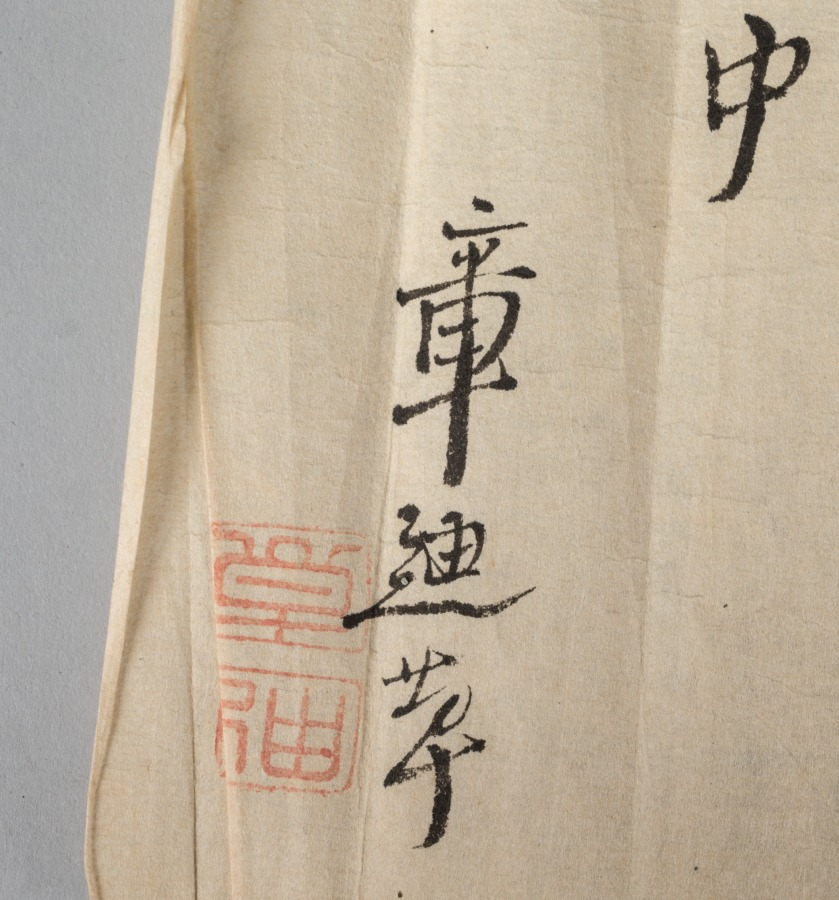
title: Happy Forest, from Water Margin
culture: Japan, Edo period (1615–1868)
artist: Matsumura Goshun (Japanese, 1752–1811)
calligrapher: and Amenomori Shōteki (Japanese, 1731–1786)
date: late 1700s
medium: hanging scroll; ink and color on paper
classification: Painting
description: The Chinese literary classic Water Margin is set in the 1120s and tells the story of 108 outlaws who first rebel against the government and then join forces with it. This painting depicts an episode in which hero Wu Song reclaims the tavern Happy Forest for its rightful owner, the prison warden’s son, Shi En. To prepare for the fight, Wu Song drinks a lot of wine. The painting was inscribed with a quote in which an ally describes Wu Song’s fighting style. It reads as follows: Where his twin fists rise, clouds and thunder roar, When his flying kick comes, wind and rain tremble.